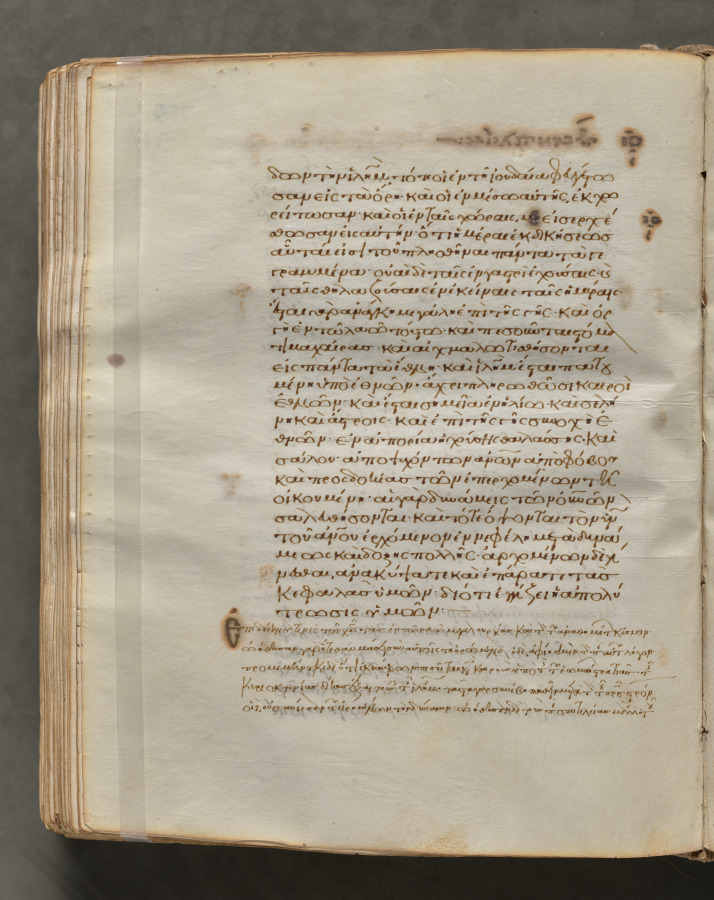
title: Text, folio 304 (verso), from a Gospel Book with Commentaries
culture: Byzantium, Constantinople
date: c. 1000–1100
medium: ink, tempera, and gold on vellum; leather binding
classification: Bound Volume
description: Each of the four gospels in this book opens on a page with brilliantly illuminated borders depicting the author of the text as well as birds—principally peacocks, symbols of the immortality of the soul—and fountains, representing the fountain of life and the salvation of the soul. This volume consists of 428 leaves with texts in Greek. Its level of sophistication suggests that it was probably written and decorated in a monastery in Constantinople.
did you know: Gospel books were carried in procession through Byzantine churches.